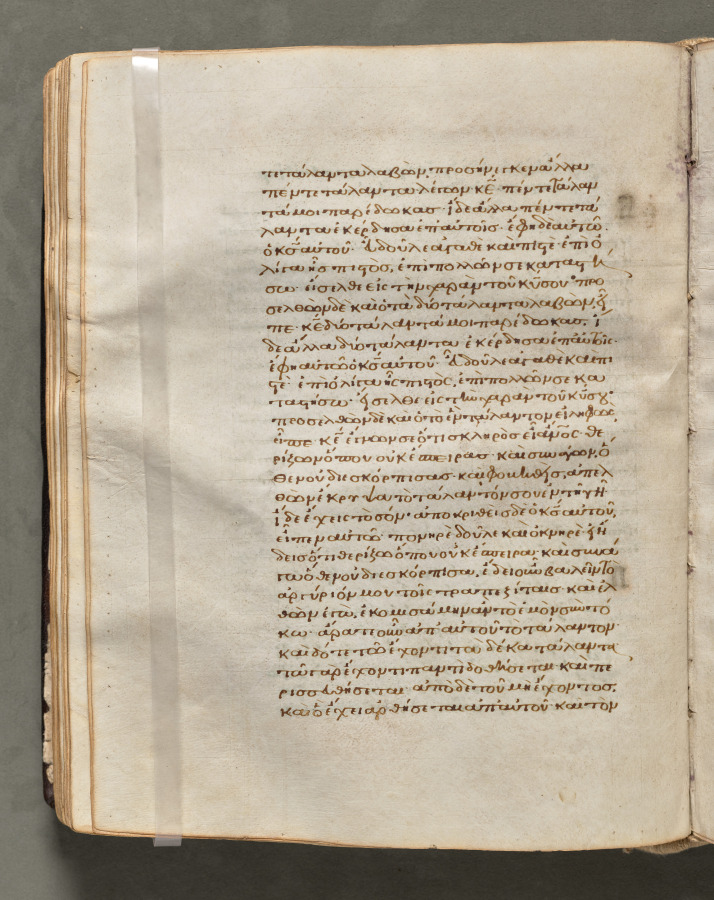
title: Text, folio 111 (verso), from a Gospel Book with Commentaries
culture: Byzantium, Constantinople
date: c. 1000–1100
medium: ink, tempera, and gold on vellum; leather binding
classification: Bound Volume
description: Each of the four gospels in this book opens on a page with brilliantly illuminated borders depicting the author of the text as well as birds-principally peacocks, symbols of the immortality of the soul-and fountains, representing the fountain of life and the salvation of the soul. This volume consists of 428 leaves with texts in Greek. Its level of sophistication suggests that it was probably written and decorated in a monastery in Constantinople.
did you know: Gospel Books were carried in procession through Byzantine churches.